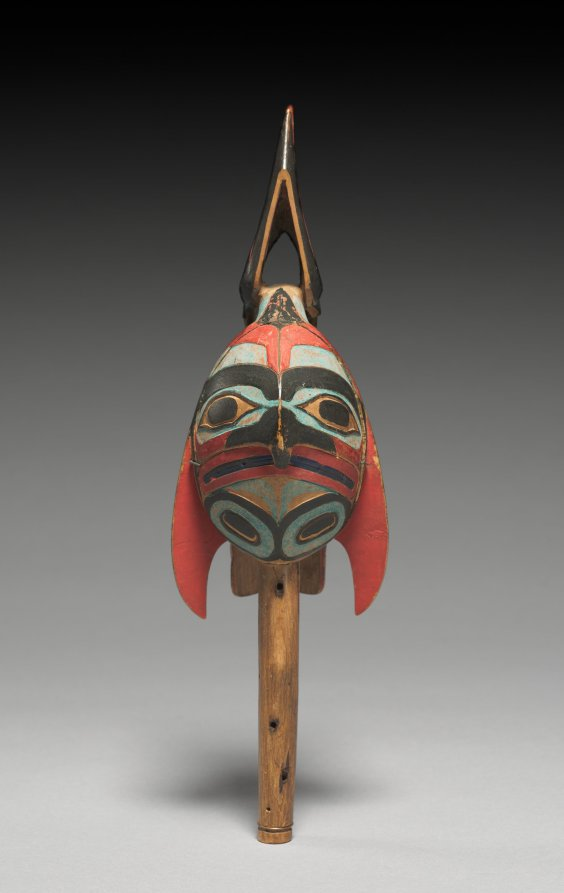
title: Raven Rattle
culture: Native North America, Northwest Coast, British Columbia and Alaska, Haida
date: late 1800s–early 1900s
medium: wood, pigment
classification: Wood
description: Rattles featuring ravens with figures on their backs may depict the acts of shamans, whose exceptional abilities allow them to interact with other-than-human beings to control weather, heal illness, or locate animals for the hunt. Such rattles may have started with shamans but secular chiefs often use them during winter ceremonies, implying they are symbols of power.